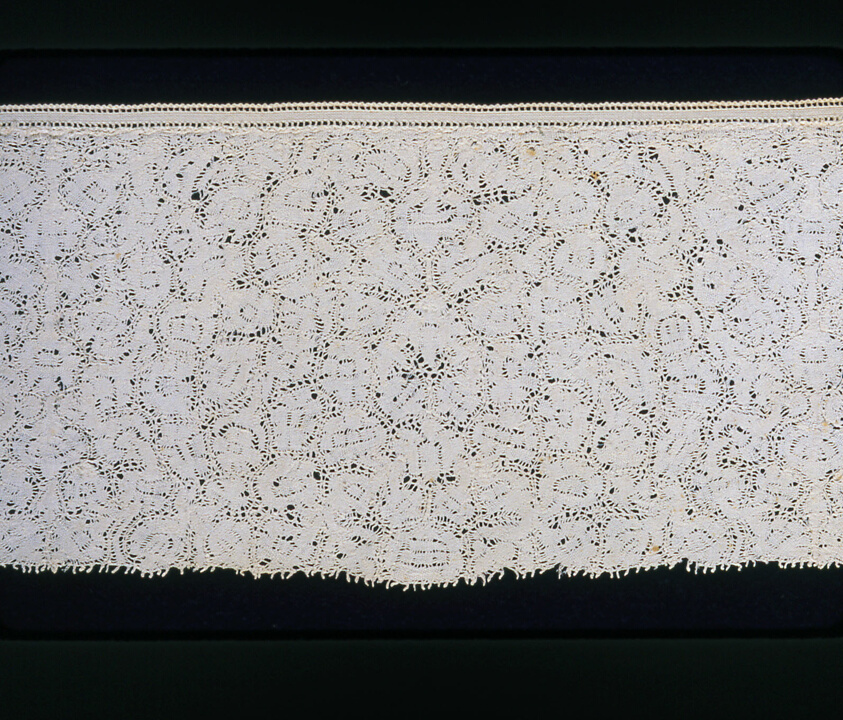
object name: Textile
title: Border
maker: Belgium, Flanders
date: 1650/60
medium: Linen, bobbin part lace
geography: Flanders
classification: textile; lace - bobbin